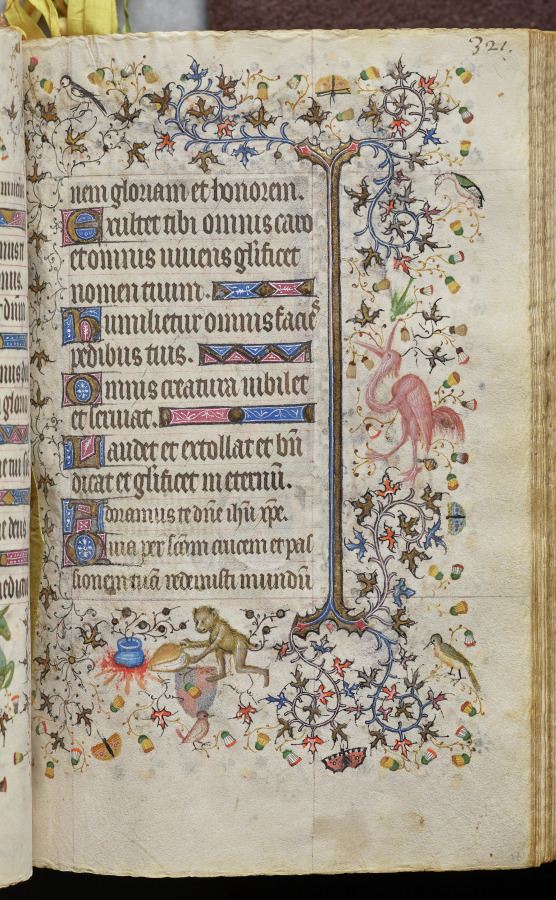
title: Hours of Charles the Noble, King of Navarre (1361-1425): fol. 161r, Text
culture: France, Paris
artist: Master of the Brussels Initials and Associates (French)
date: c. 1405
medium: ink, tempera, and gold on vellum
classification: Bound Volume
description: This precious volume was obviously highly prized by its owner, the French-born King of Navarre, who had his coat of arms painted on no less than twenty folios. Rather than directly commissioning this manuscript from a specific workshop, it seems that Charles the Noble acquired his book of hours -- perhaps ready-made for the luxury market -- while on a trip to Paris in 1404-05. A collaborative effort, six painting styles are evidenced within the pages of this codex, those of two Italians, two Frenchmen, and two Netherlanders. The painter who was responsible for the planning and decoration of the book, and who produced seventeen of the large miniatures, was a Bolognese artist known as the Master of the Brussels Initials. His principal assistant, responsible for most of the borders, was a Florentine who signed his name "Zecho" da Firenze on folio 208 verso.